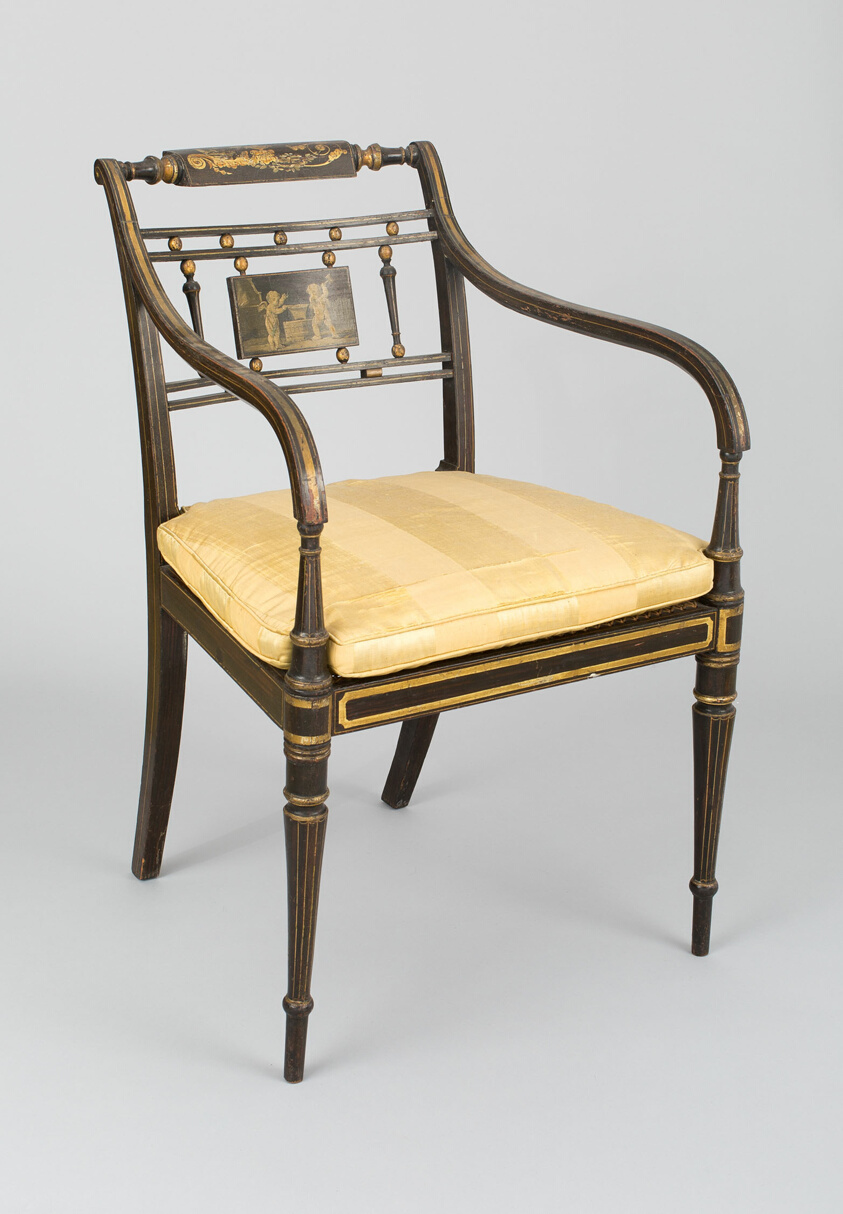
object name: Furniture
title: Armchair with Tablet: Putti at Vulcan's Forge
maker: Attributed to John Gee; English, 1765-1824; London, England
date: c. 1790/1800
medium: Beechwood, painted to simulate rosewood and en grisaille; partly gilded; caned seats and seat cushion not original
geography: England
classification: seating; furniture; european decorative arts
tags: furniture